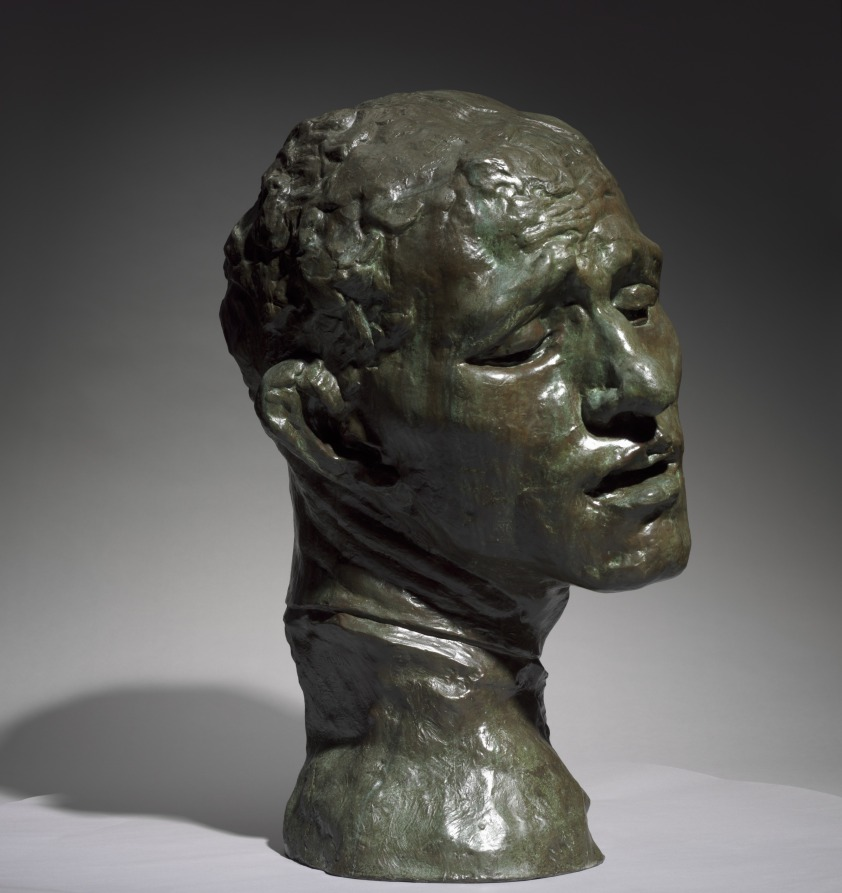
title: Heroic Head of Pierre de Wissant, One of the Burghers of Calais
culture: France, 19th century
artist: Auguste Rodin (French, 1840–1917)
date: 1886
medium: bronze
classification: Sculpture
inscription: inscribed at neck, left: A.Rodin; inscribed lower back: Alexis Rudier/Fondeur-Paris.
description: This sculpture depicts one of the figures in Rodin’s large public monument The Burghers of Calais (1884–89), featuring six French men who volunteered to be taken prisoner by the English in exchange for lifting the siege of Calais during the Hundred Years War (1337–1453). Pierre de Wissant’s anguished expression suggests extreme mental suffering as he contemplates his expected execution. Rodin exhibited a life-size version of the figure as an independent work before completing the monument. He later made multiple versions in various sizes and media.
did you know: This sculpture depicts the head of a figure from Rodin's large public monument The Burghers of Calais (1884-89). The CMA also owns a plaster version of the head.